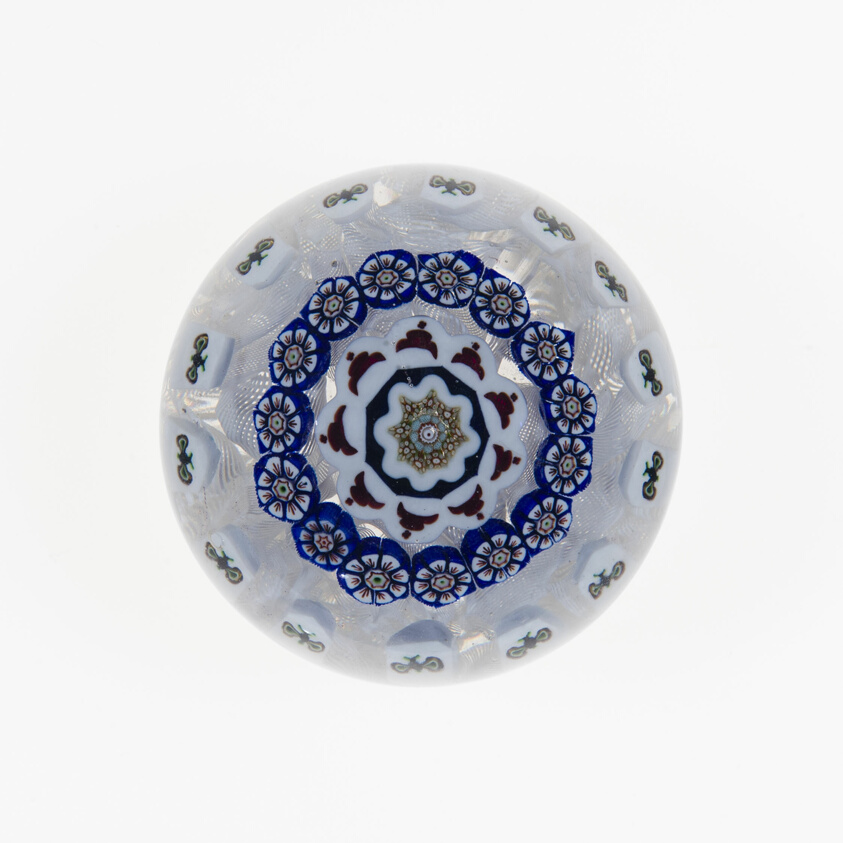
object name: Glass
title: Paperweight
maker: Baccarat Glassworks (Cristalleries de Baccarat); Lorraine, France, founded 1764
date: c. 1846–55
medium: Glass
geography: Baccarat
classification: paperweight; glass